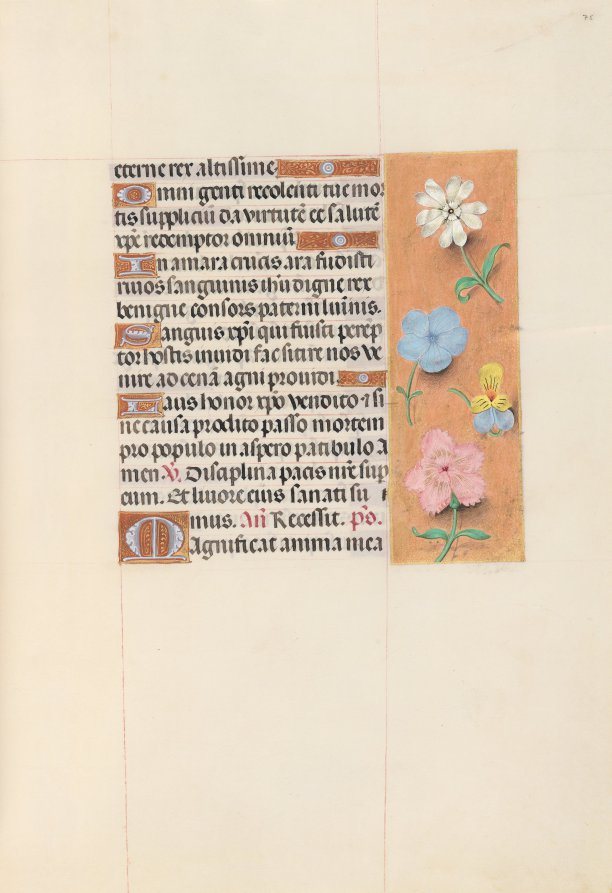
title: Hours of Queen Isabella the Catholic, Queen of Spain: Fol. 75r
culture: Flanders, Ghent and Bruges, late 15th century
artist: Master of the First Prayerbook of Maximillian (Flemish, c. 1444–1519)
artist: and Associates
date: c. 1500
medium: ink, tempera, and gold on vellum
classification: Bound Volume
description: This manuscript was illuminated by a circle of at least five highly organized manuscript painters active in the Flemish cities of Ghent and Bruges. The principal illuminator was Alexander Bening, who painted the majority of the book's miniatures. Manuscripts produced by this circle of artists are renowned for the decoration of their borders, which typically feature a rich variety of realistically-painted flowers, birds, and butterflies. This prayer book, called a book of hours, was intended not for a cleric, but for the private devotions of a lay person-in this case, Isabella the Catholic, Queen of Spain (1451-1504). Isabella's coat of arms embellishes the book's frontispiece. It is unlikely that the book was commissioned by the Queen herself; rather, she probably received it as a diplomatic gift from someone courting her patronage, perhaps Cardinal Francisco Jimenez de Cisneros. A Franciscan friar, Jimenez was dependent upon Isabella for his advancement, first to the post of Queen's confessor in 1492, and then to Archbishop of Toledo in 1495.